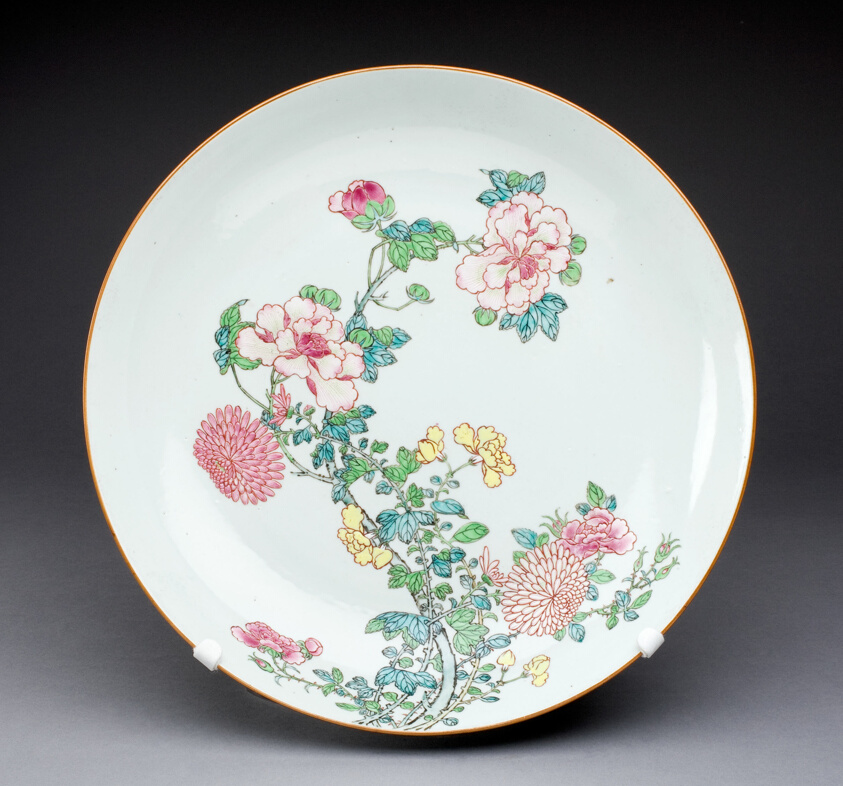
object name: Ceramics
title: Dish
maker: China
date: c. 1725, Qing Dynasty (1644–1911), Yongzhen period (1723–1735)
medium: Hard-paste porcelain and polychrome enamels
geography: China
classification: dish (vessel); ceramics